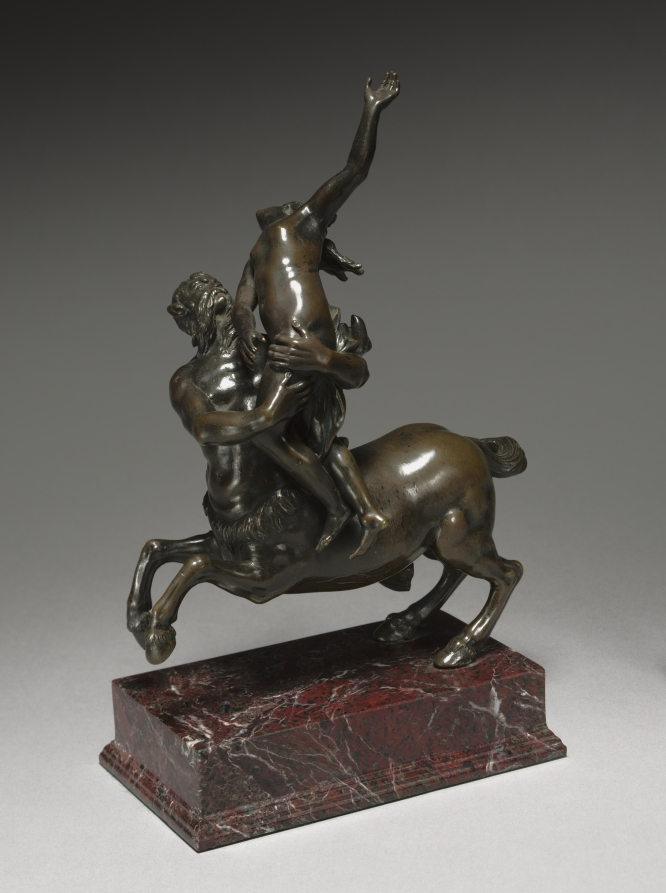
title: Nessus and Deianeira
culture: Italy, 17th century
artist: Francesco Fanelli (Italian, 1661)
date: made in England, probably 1630–40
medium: bronze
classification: Sculpture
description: Fanelli apparently came from Florence and this group clearly indicates that he was familiar with the work of Giambologna, the leading sculptor active in that city around 1600.